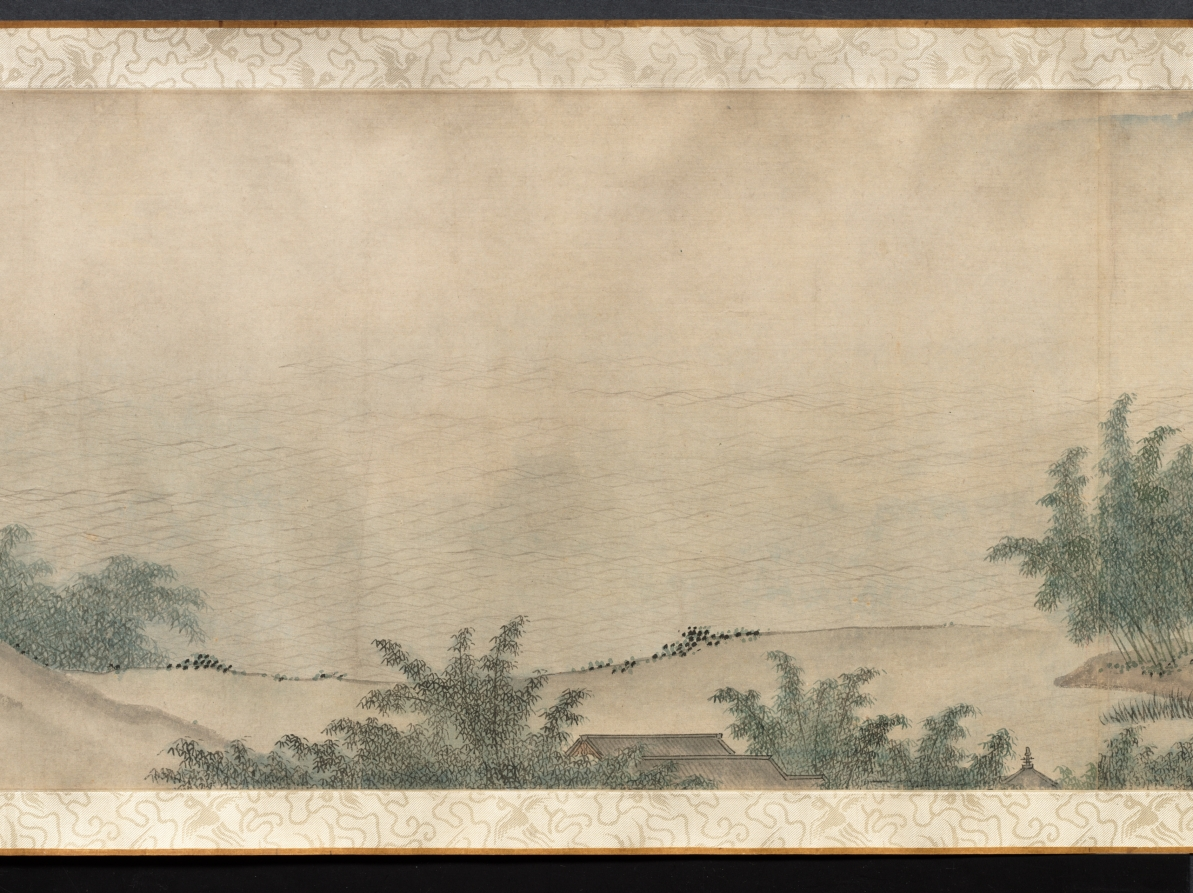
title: Ten Thousand Li of the Yangzi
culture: China, Ming dynasty (1368–1644)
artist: Dai Jin (Chinese, 1388–1462)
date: c. 1400s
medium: Handscroll; ink and color on paper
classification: Painting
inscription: Two colophons at end. Artist's seals: Dai Jin 戴進 and Wenjin 文進.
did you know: Dai Jin is traditionally considered the founder of the Zhe School, a style of landscape painting.